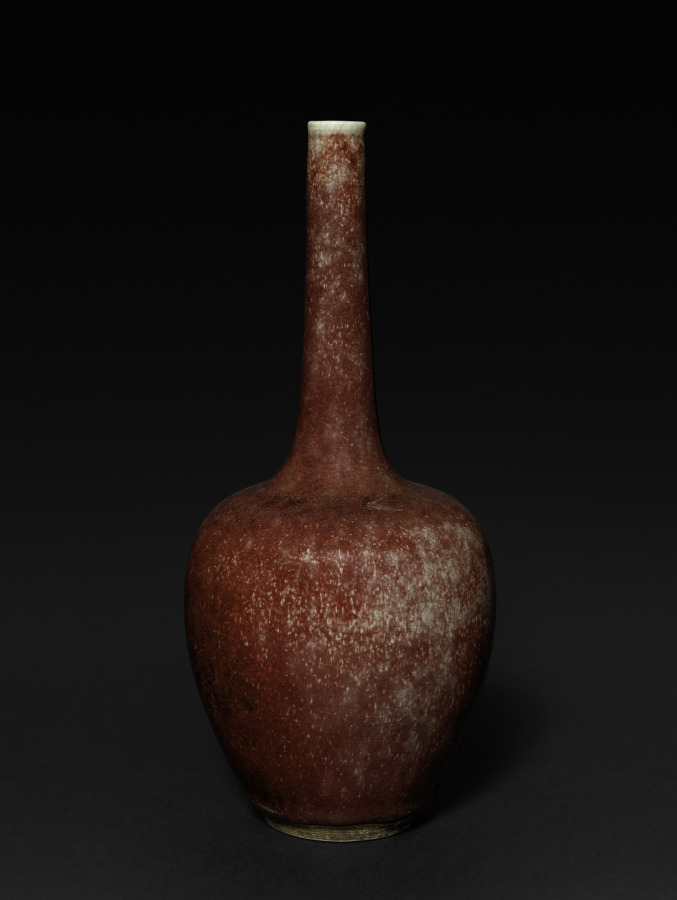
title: Bottle Vase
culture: China, Jingdezhen, Jiangxi province, Qing dynasty (1644–1911), Kangxi reign (1662–1722)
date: 1662–1722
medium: porcelain, Lang ware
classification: Ceramic